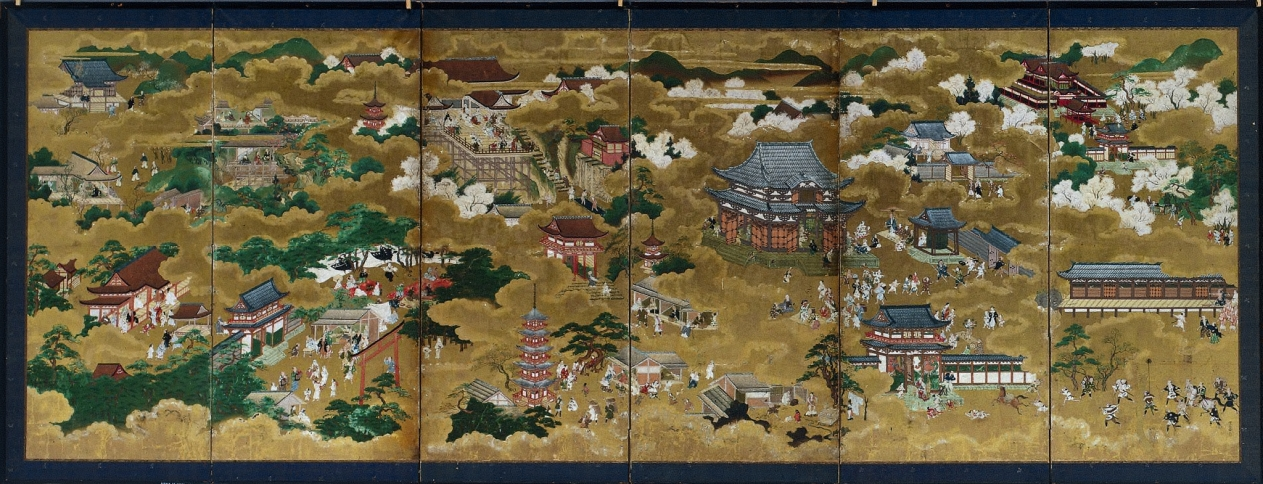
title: Views of Kyoto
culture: Japan, Edo period (1615–1868)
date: 1600s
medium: six-fold screen; ink and color on gold paper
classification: Painting